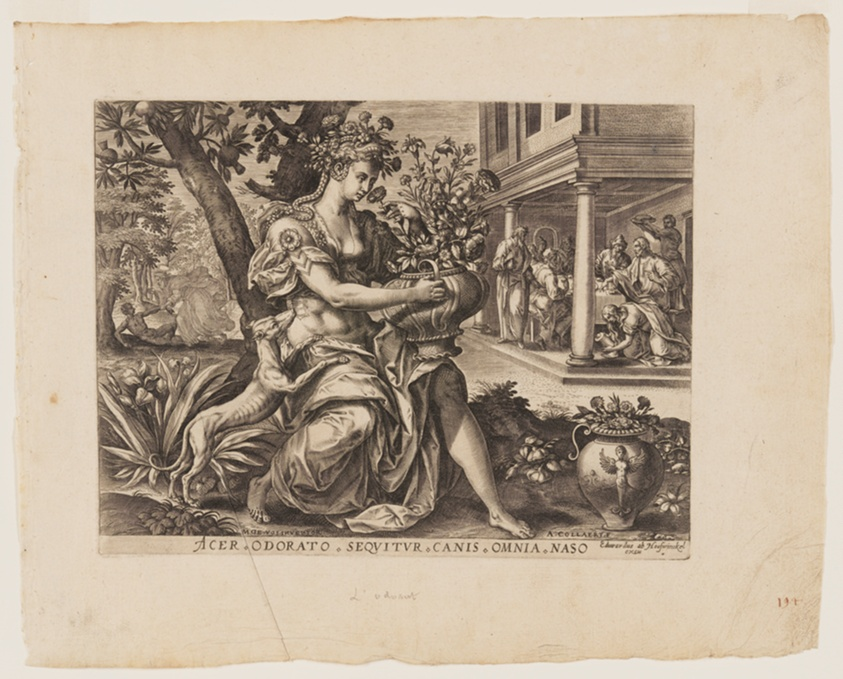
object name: Print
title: Smell, from The Five Senses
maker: Adriaen Collaert (Flemish, c. 1560–1618); after Maarten de Vos (Flemish, 1532–1603)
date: c. 1580-1590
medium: Engraving on ivory laid paper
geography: Flanders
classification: engraving; paper; print; prints and drawing